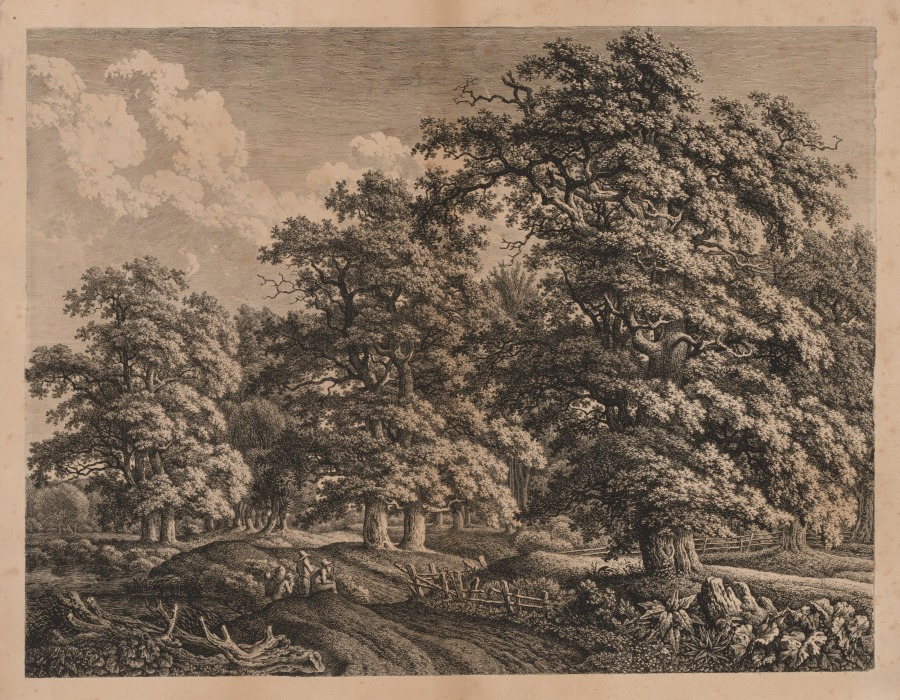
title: Landscape and Three Figures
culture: Germany, 18th-19th century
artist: Carl Wilhelm I Kolbe (German, 1757–1835)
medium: engraving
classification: Print